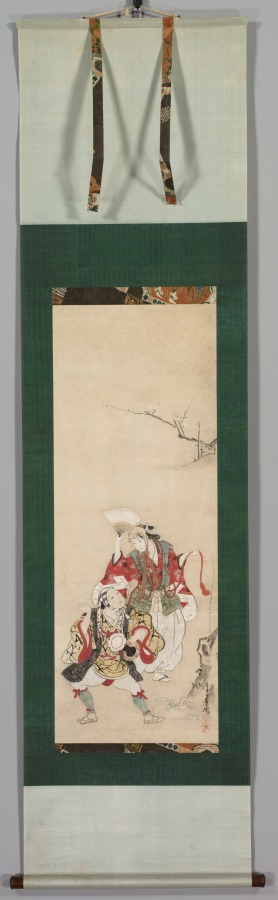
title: Spring Dancers (Manzai)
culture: Japan, Edo period (1615–1868)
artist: Miyagawa Chōshun (Japanese, 1683–1753)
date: early to mid-1700s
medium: hanging scroll; ink and color on paper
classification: Painting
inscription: Artist's signature and gourd-shaped seal lower right corner.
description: Manzai is the Japanese term for wandering comic dancers. The painting depicts one of the traditional pleasures of the spring season.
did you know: One performer is playing a hand-held drum, like CMA 1918.349.